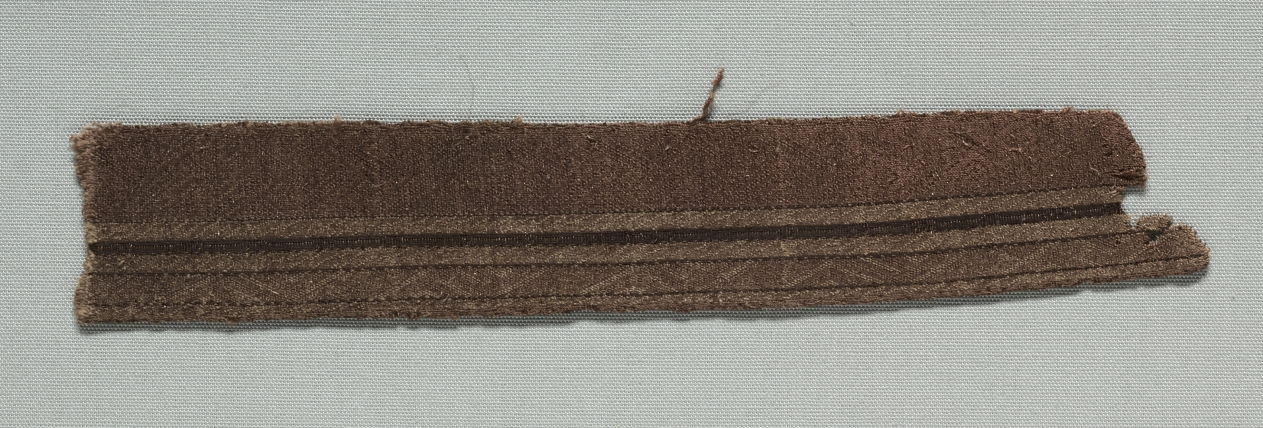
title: Fragment of a Band (2 of 2)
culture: Italy, Sicily, end of 11th century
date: late 1000s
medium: tablet weave; silk and gold metal thread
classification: Textile